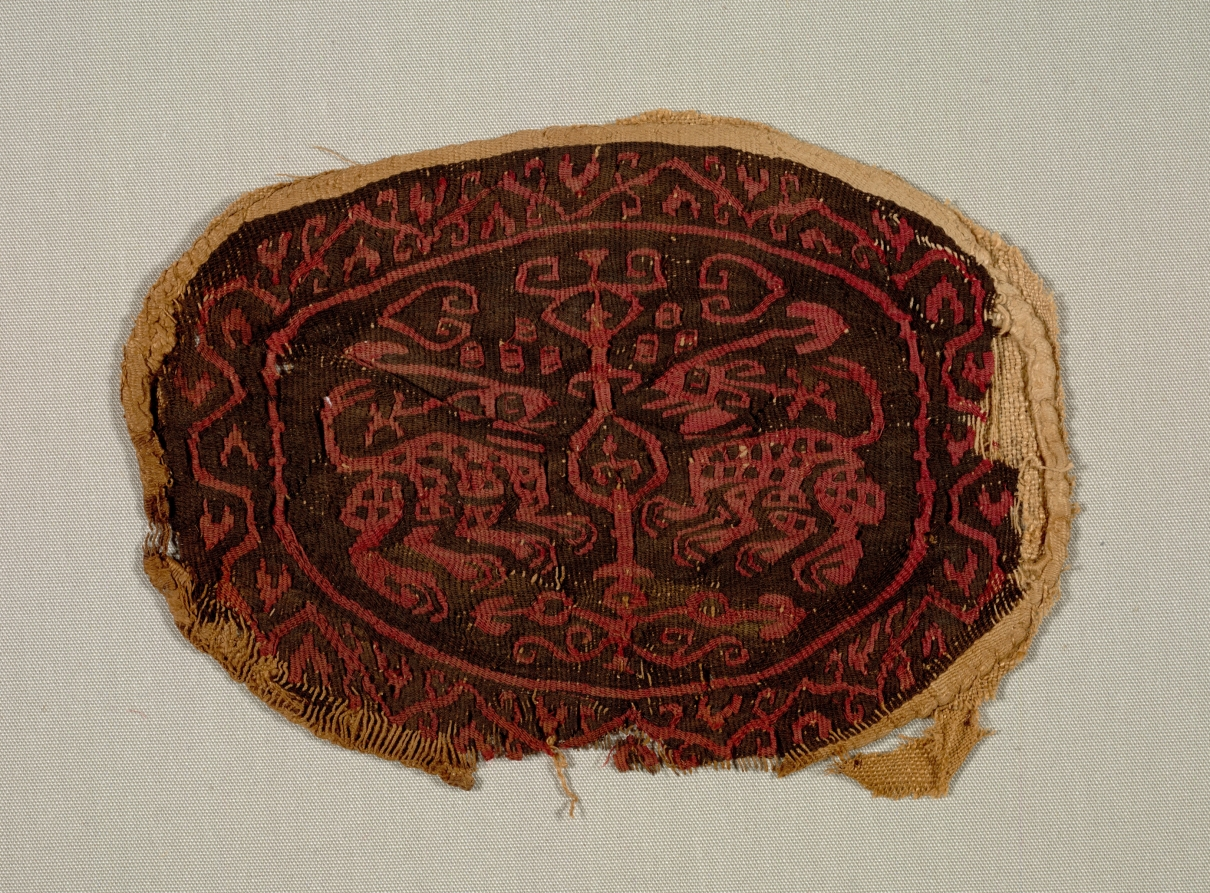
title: Two Confronted Animals from a Tunic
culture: Egypt, Islamic period, Abbasid, 8th - 9th century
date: 700s-800s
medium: plain weave with slit-tapestry weave, applied; dyed wool, undyed linen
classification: Textile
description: Two spotted animals flank a simplified tree with more roots than leaves, framed by an angular vine. The nearly symmetrical pattern, woven in simple tapestry weave, was influenced by more complex weaves, visible in the silks displayed below.